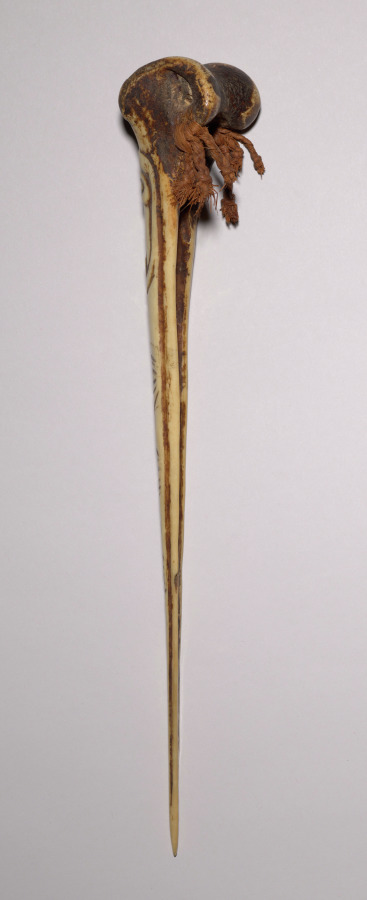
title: Dagger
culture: Melanesia, Papua New Guinea, Sepik River region, 19th century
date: c. 1880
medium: cassowary bone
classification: Sculpture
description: This dagger is decorated with an incised human face and a geometric pattern.